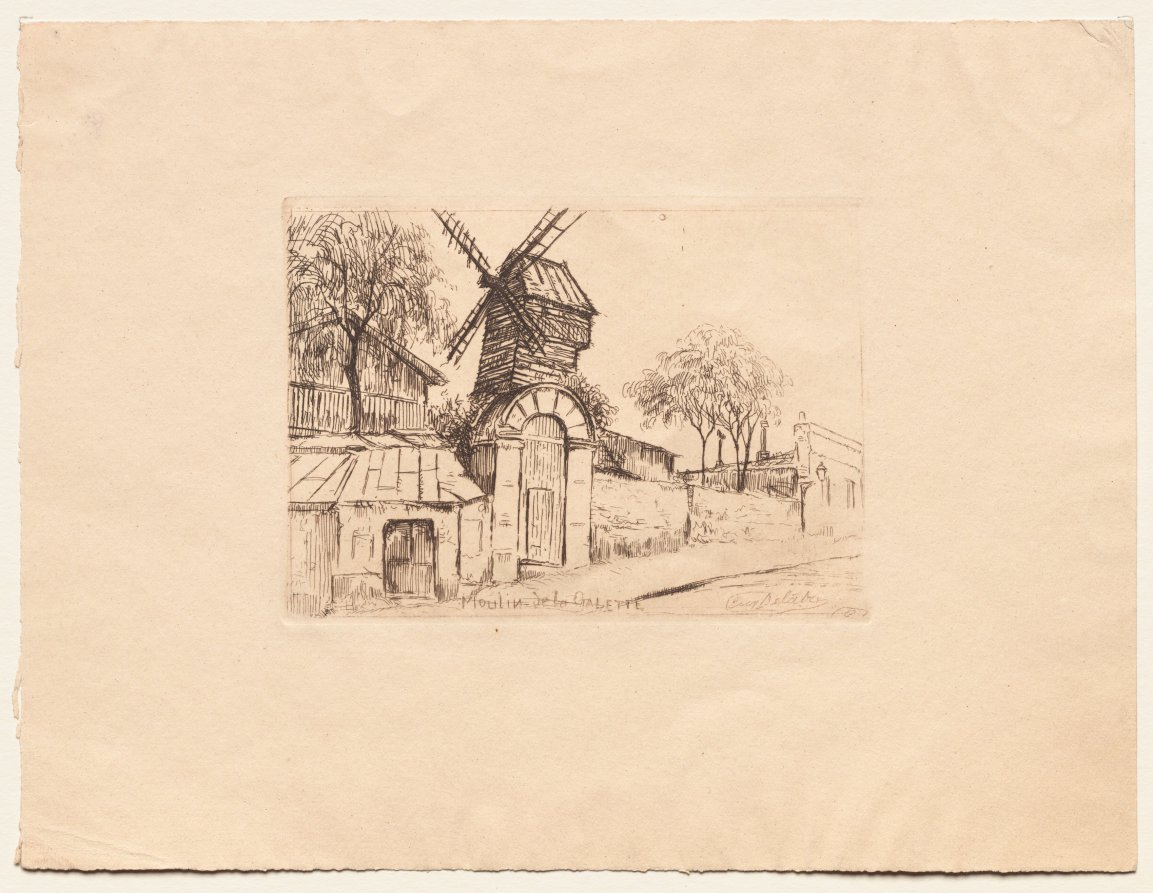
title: Moulin de la Galette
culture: France, 19th century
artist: Eugène Delâtre (French, 1864–1938)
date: c. 1910–20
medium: etching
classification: Print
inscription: inscribed, lower center, in plate: Moulin de la Galette signed lower right in plate: Eug. Delatre